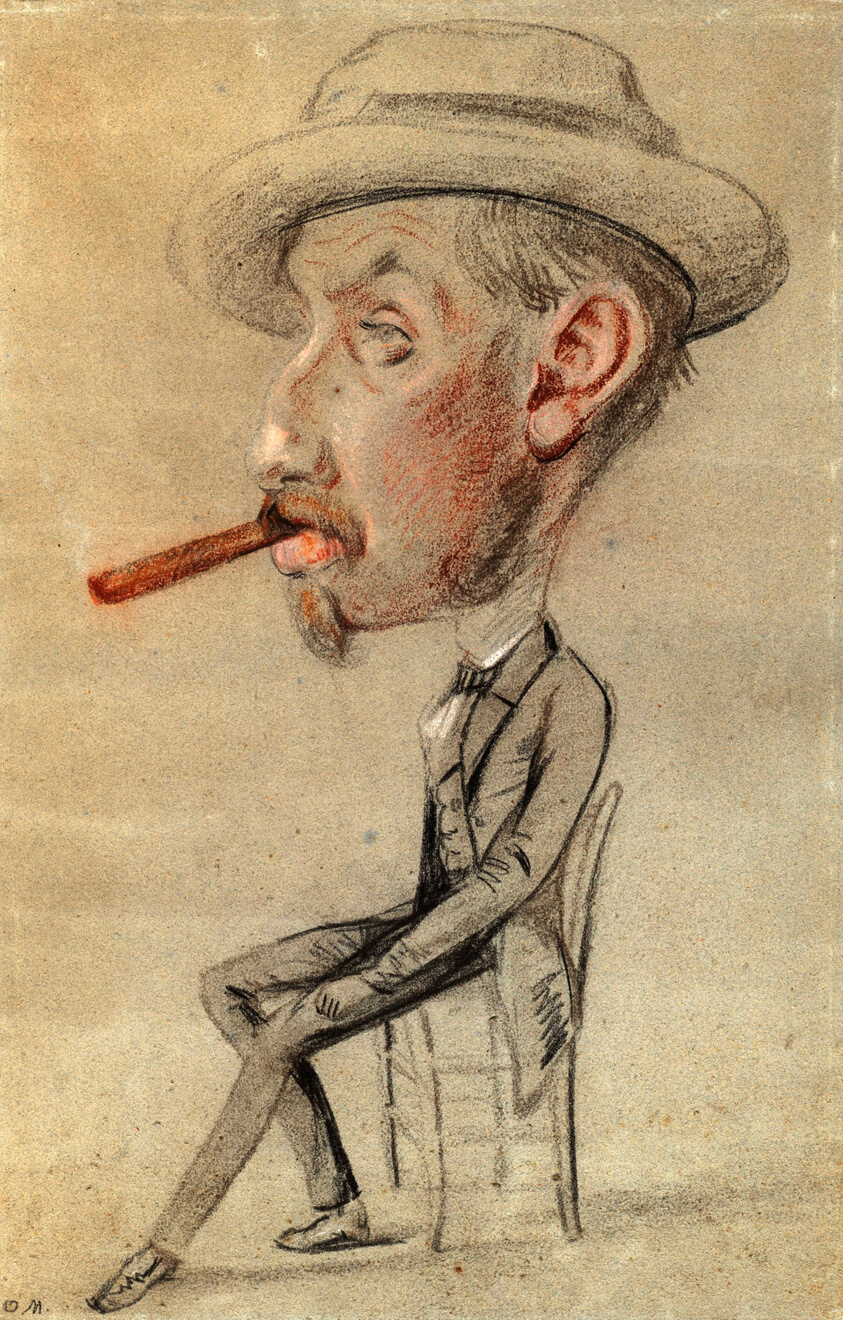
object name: Drawing and Watercolor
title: Caricature of a Man with a Big Cigar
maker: Claude Monet (French, 1840-1926)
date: 1855/56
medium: Black, white, and colored chalks on blue wove paper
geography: France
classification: charcoal; drawings (visual works); prints and drawing